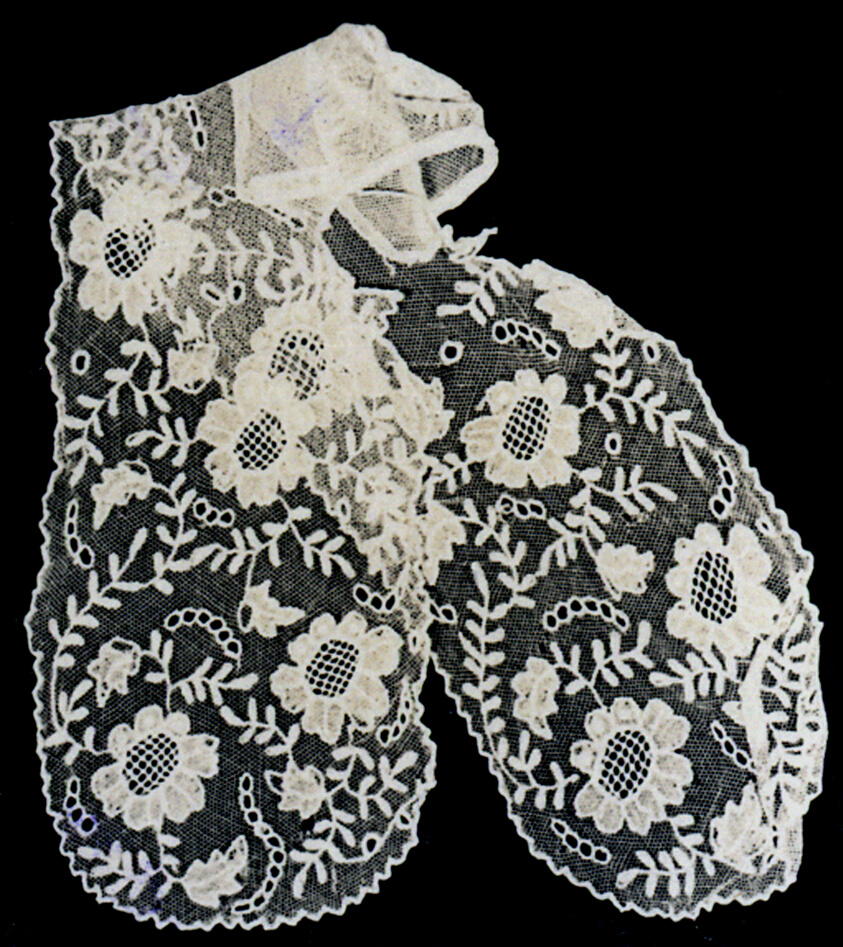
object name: Textile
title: Cap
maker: Probably France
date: 1875/1900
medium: Cotton, machine-made net; appliquéd with plain weave and embroidered in buttonhole, darning, eyelet, overcast, and satin stitches; laid work and darned wheels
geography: France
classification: textile; lace - mixed